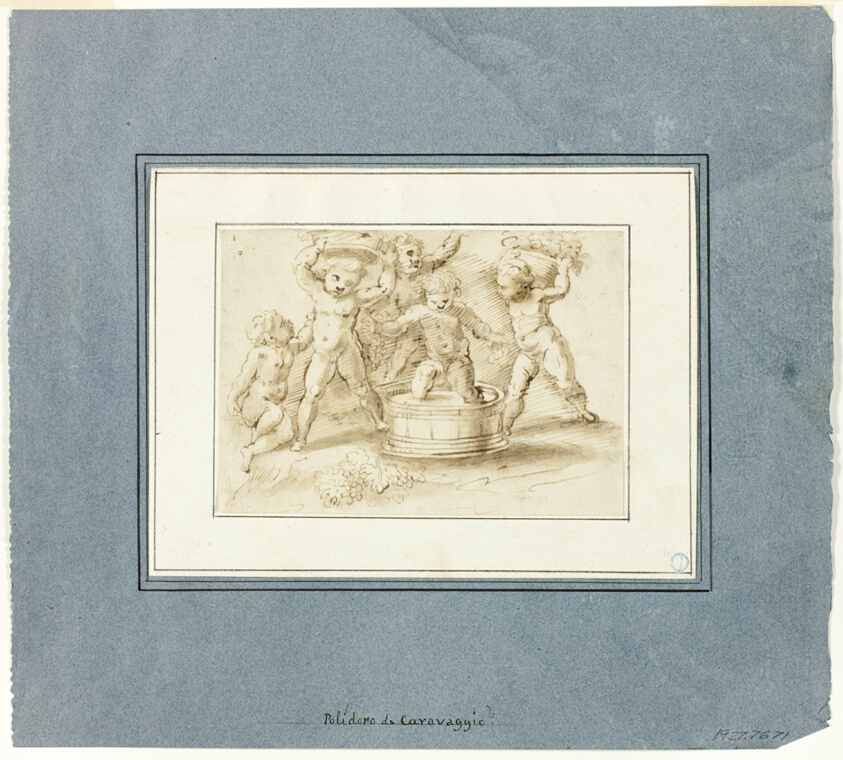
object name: Drawing and Watercolor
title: Putti Making Wine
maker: Unknown Italian artist; Mid-16th century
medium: Pen and brown ink with brush and brown wash, on ivory laid paper, laid down on ivory laid paper, tipped on to blue wove paper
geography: Italy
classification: ink with wash; drawings (visual works); prints and drawing